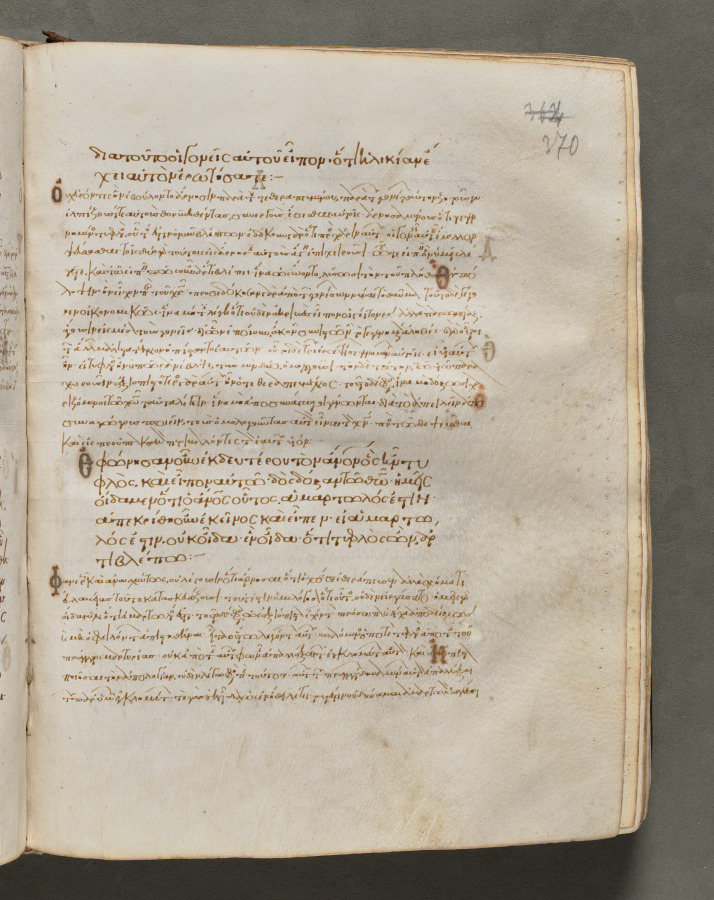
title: Text, folio 370 (recto), from a Gospel Book with Commentaries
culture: Byzantium, Constantinople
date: c. 1000–1100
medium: ink, tempera, and gold on vellum; leather binding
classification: Bound Volume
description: Each of the four gospels in this book opens on a page with brilliantly illuminated borders depicting the author of the text as well as birds—principally peacocks, symbols of the immortality of the soul—and fountains, representing the fountain of life and the salvation of the soul. This volume consists of 428 leaves with texts in Greek. Its level of sophistication suggests that it was probably written and decorated in a monastery in Constantinople.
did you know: Gospel books were carried in procession through Byzantine churches.